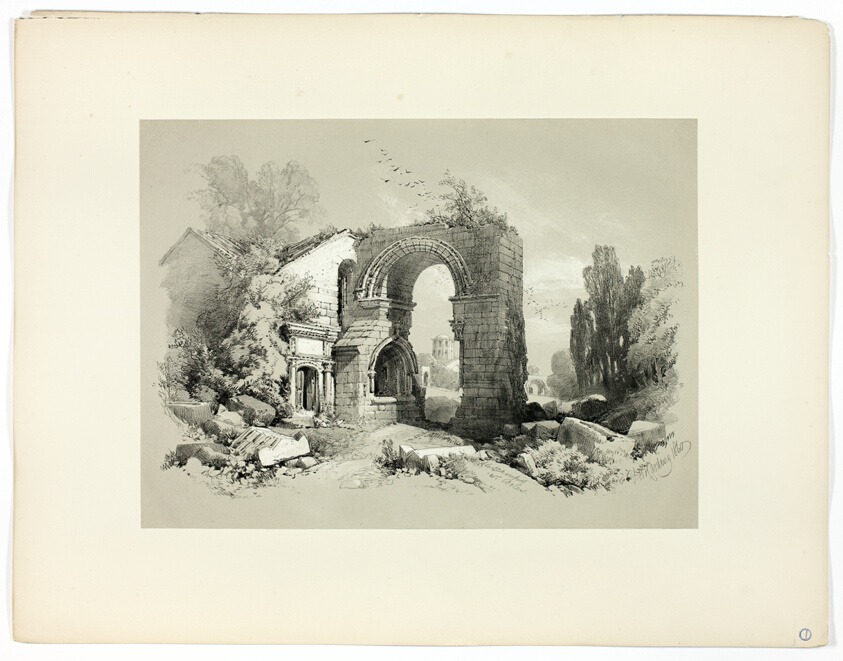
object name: Print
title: Aliscamps, W. Arles, from Picturesque Selections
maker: James Duffield Harding, (English, 1798-1863); Published by W. Kent and Co.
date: 1860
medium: Lithograph on paper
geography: England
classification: lithograph; print; prints and drawing